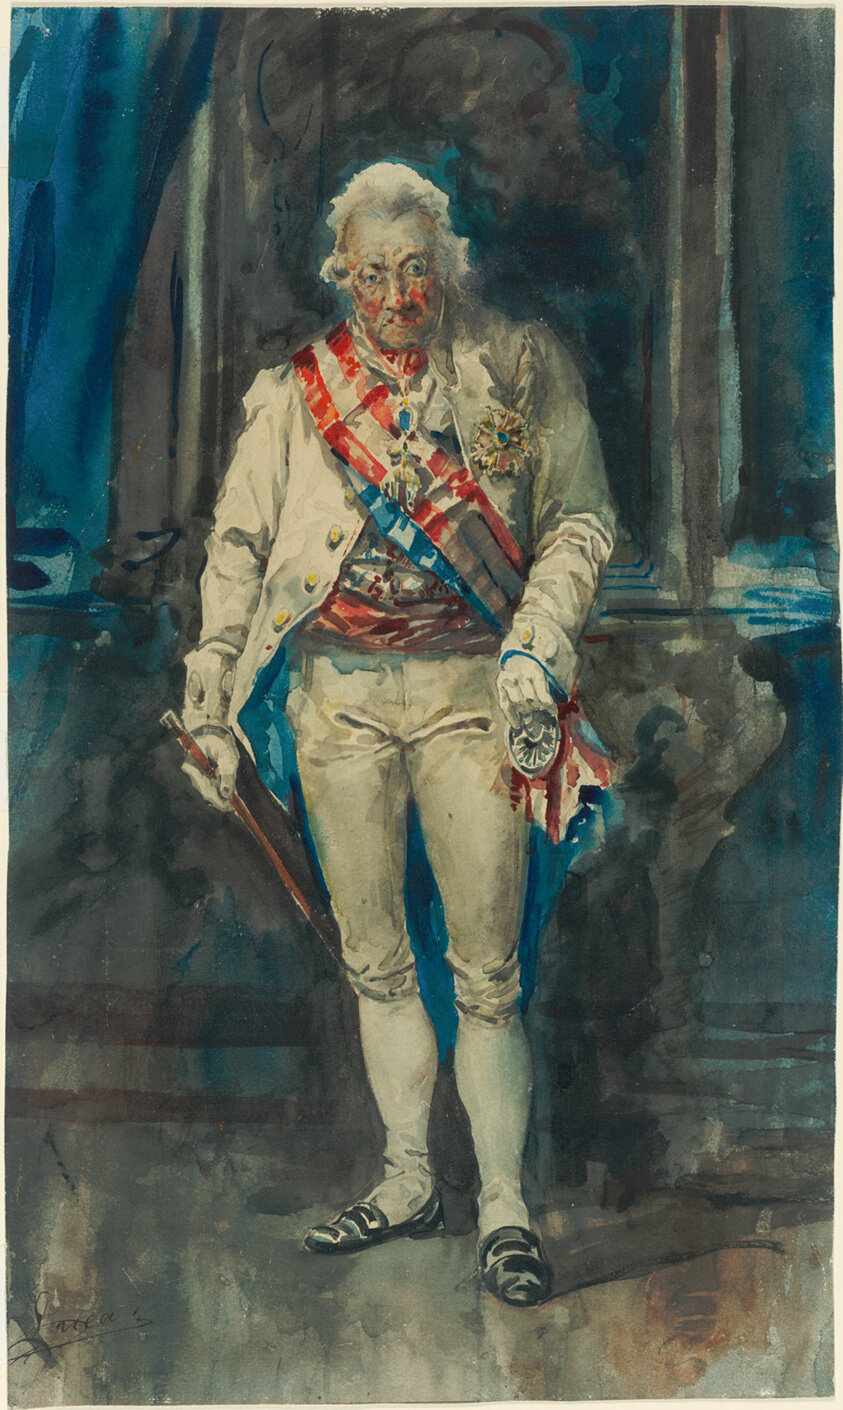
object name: Drawing and Watercolor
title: King Charles IV of Spain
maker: Eugenio Lucas Velázquez (Eugenio Lucas y Padilla); Spanish, 1817-1870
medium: Watercolor, with touches of pen and black ink, and traces of black crayon, on ivory watercolor paper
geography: Spain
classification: watercolor; drawings (visual works); prints and drawing